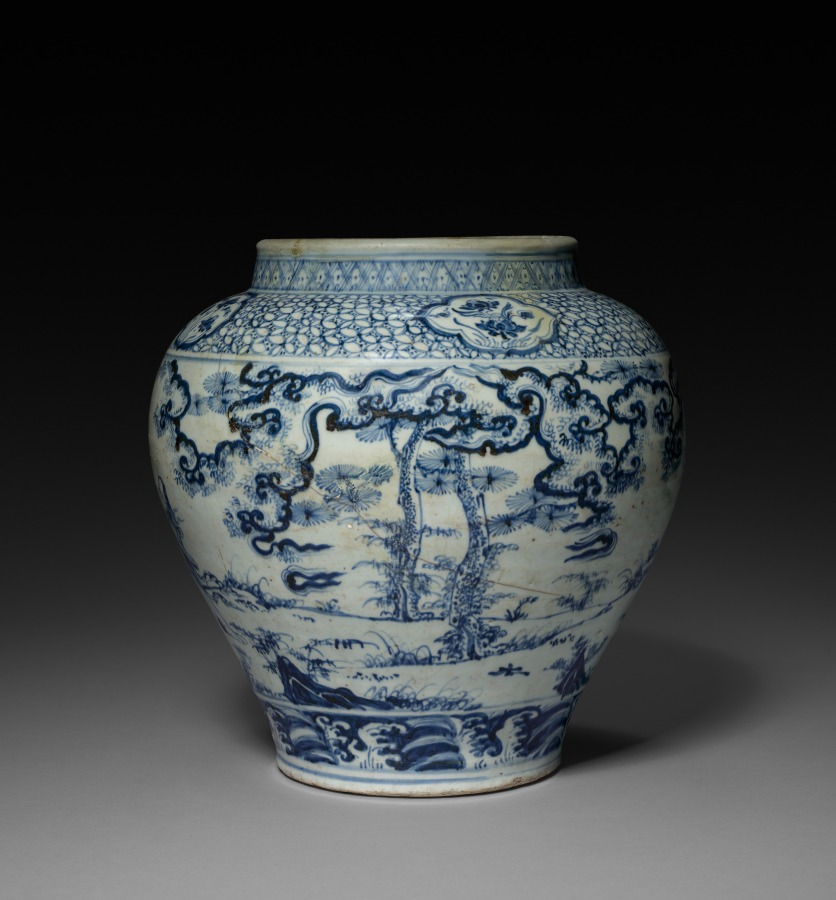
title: Jar with Scenes from the Land of Daoist Immortals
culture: China, Ming dynasty (1368–1644)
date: early 1400s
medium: porcelain with underglaze blue decoration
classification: Ceramic